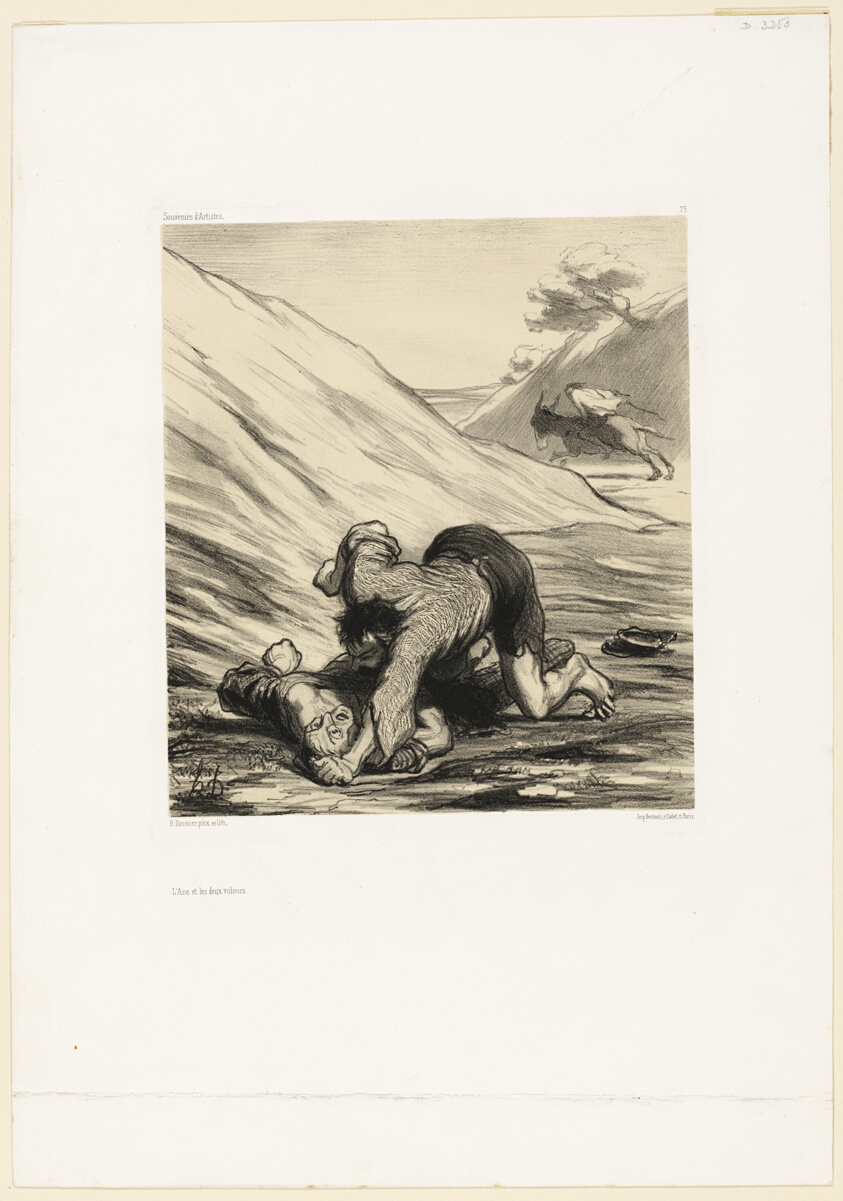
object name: Print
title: The Ass and Two Thieves, plate 75 from Souvenirs d’artistes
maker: Honoré Victorin Daumier (French, 1808-1879); printed by Bertauts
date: 1862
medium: Lithograph in black, with scraping on stone and with fawn tint stone on ivory wove paper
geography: France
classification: print; lithograph; prints and drawing